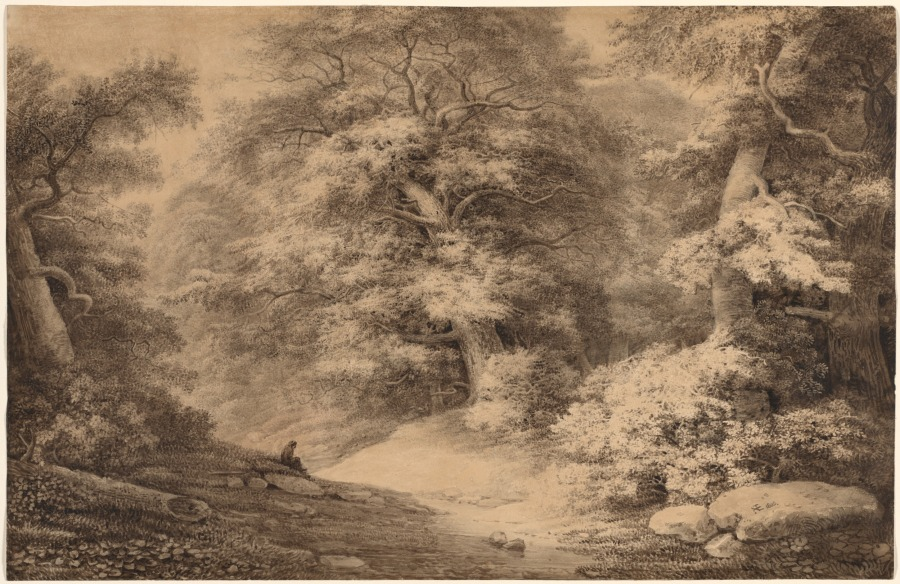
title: A Beech Wood with a Resting Traveler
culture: Germany, 19th century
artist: Christoph Nathe (German, 1753–1806)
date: 1803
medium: brown and gray wash with extensive point of brush work, with traces of black chalk underdrawing on ivory wove paper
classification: Drawing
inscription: Inscribed lower right in brown watercolor:" CN 1823" Verso: collector's stamp, in light brown ink: "Dr. Apelt / Zittau enclosed in a square [not in Lugt]" in graphite: "No. 6 [crossed out]" in blue ink: "Nathe"